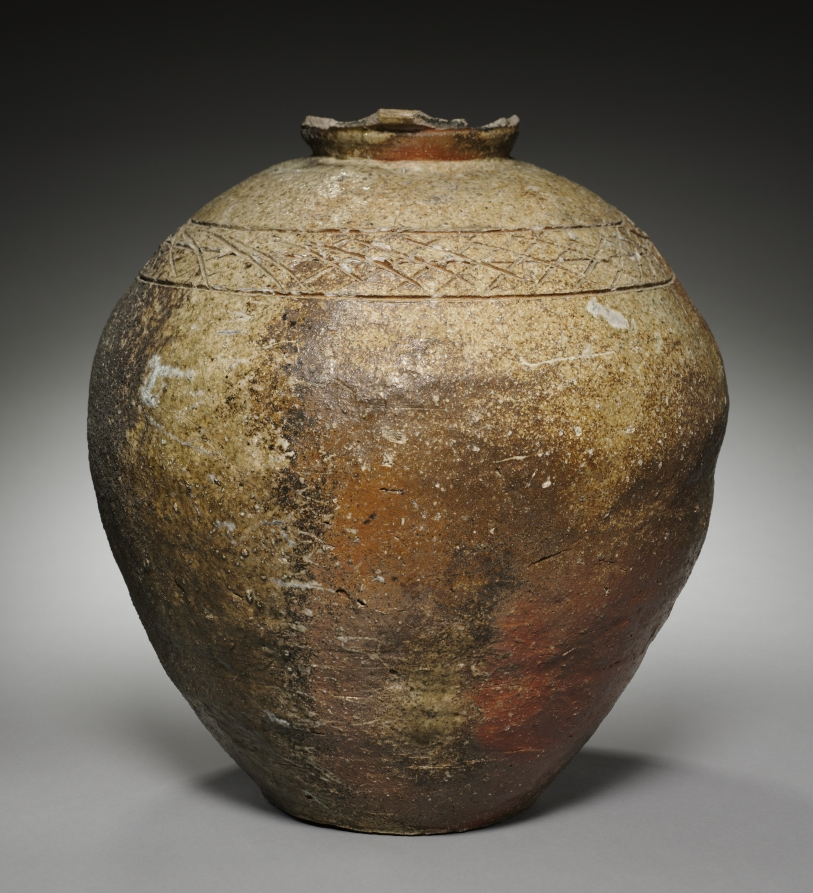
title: Storage Jar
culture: Japan, Muromachi period (1392–1573)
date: late 1300s–1400s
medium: Stoneware with natural ash glaze (Shigaraki ware)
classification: Ceramic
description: The red color of this jar comes from iron in the clay. Natural ash glaze settled on the vessel during firing. The rim would have been complete with a slightly flared lip. Around the collar is an incised pattern resembling cypress fences, a common scene in the Japanese landscape. Intended for grain storage, rustic vessels like this one were also prized by tea enthusiasts, who appreciated the uncalculated beauty of the glaze and the asymmetry of these humble vessels.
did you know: This jar was probably made using a coiling method, where coils of clay are stacked atop each other and smoothed to form its structure.